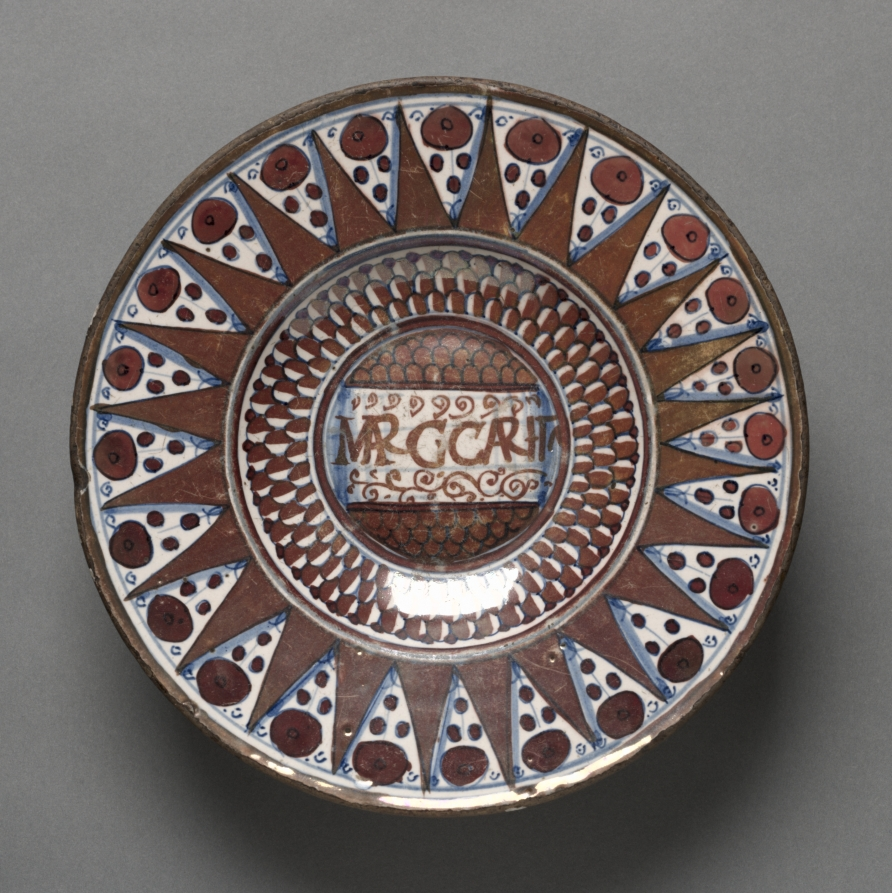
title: Plate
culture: Italy, early 16th century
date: early 1500s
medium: tin-glazed earthenware (maiolica)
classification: Ceramic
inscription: on front, in center: MARGGARITA.